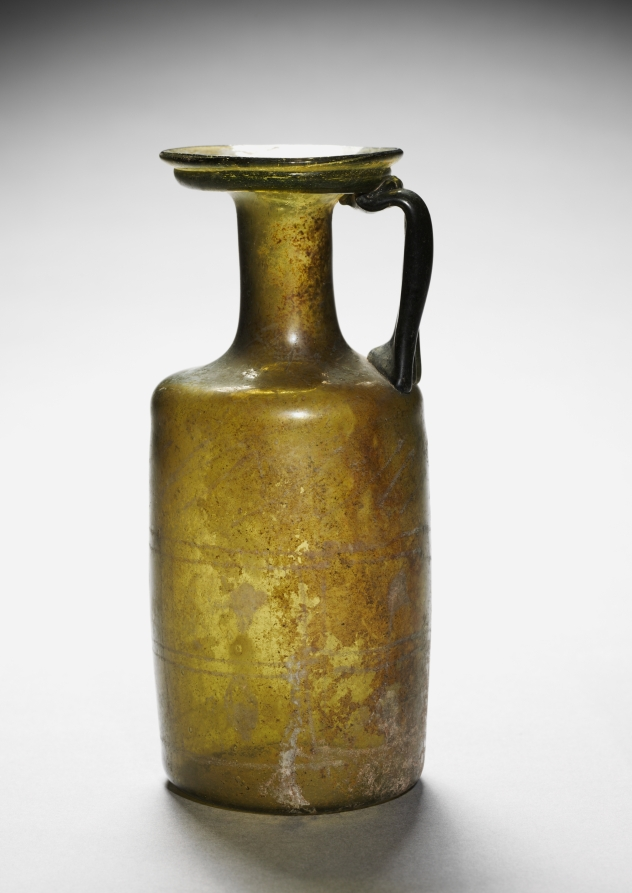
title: Pitcher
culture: Syro-Palestinian, Roman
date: 200–400 CE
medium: glass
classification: Glass